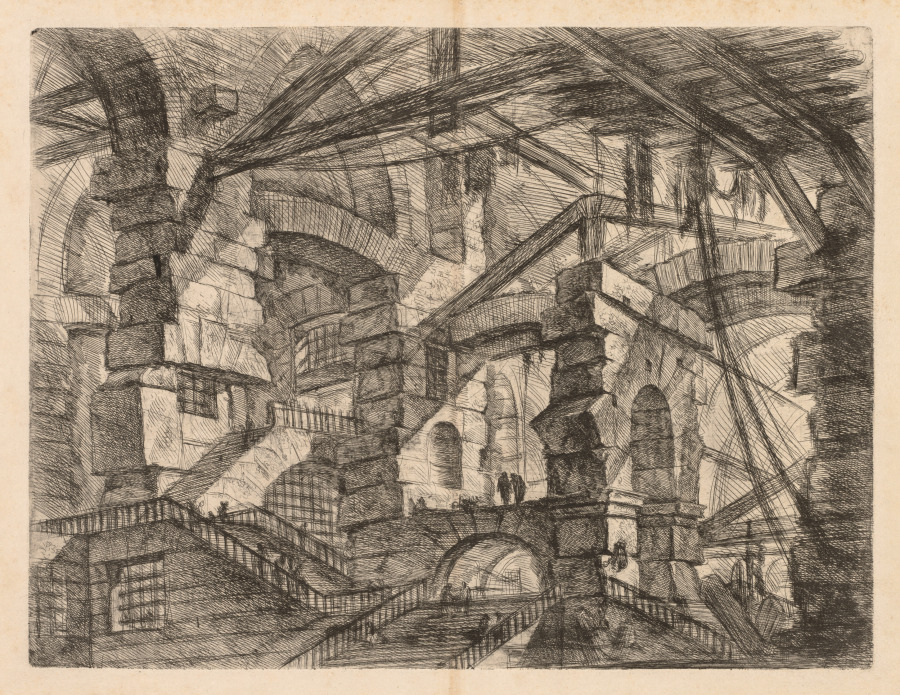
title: The Prisons: A Perspective of Colonnades with Zig-Zag Staircase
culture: Italy, 18th century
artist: Giovanni Battista Piranesi (Italian, 1720–1778)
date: 1745–1750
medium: etching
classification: Print